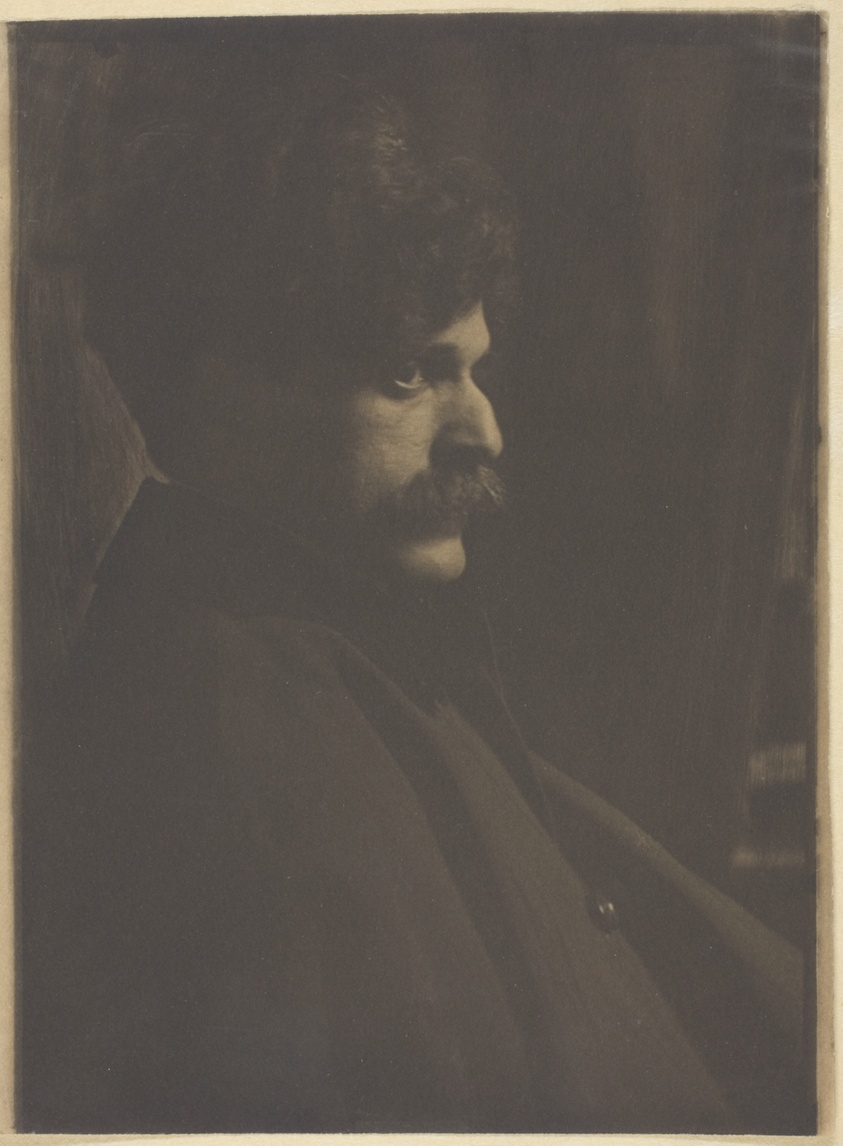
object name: Photograph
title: Portrait of Alfred Stieglitz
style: Pictorialism, 19th century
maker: Frank Eugene (American, 1865–1936)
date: c. 1899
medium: Platinum print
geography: United States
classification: platinum print; photographic process; photography; photograph